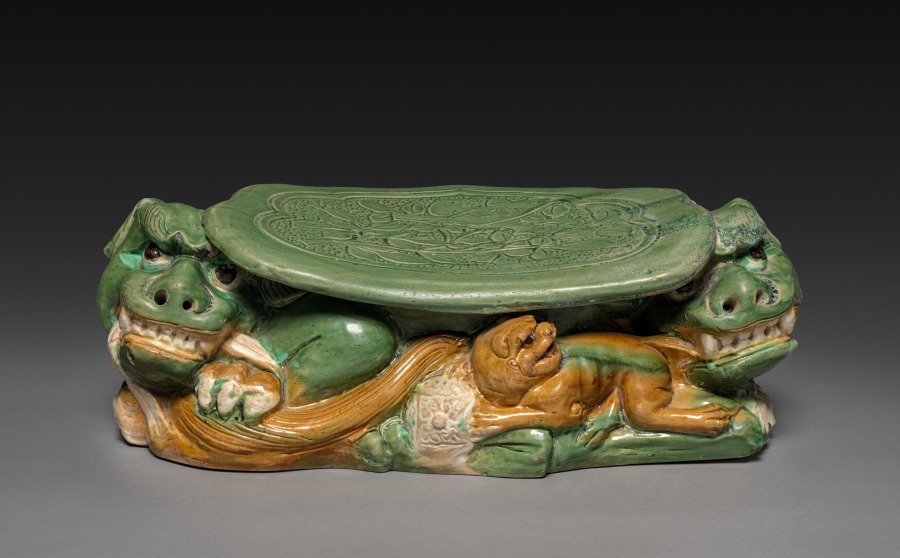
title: Headrest with Three Lions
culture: China, Liao dynasty (916-1125)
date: 916–1125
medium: Glazed earthenware, sancai (three-color ware)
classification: Ceramic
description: Three lions—two ferocious adults and one playful cub—form the base of this Chinese headrest. Often found at burial sites, headrests probably had multiple uses for their owners, but their exact origins are unknown. As ceramic pillows, headrests were cooling on hot summer nights. As decorative objects, their form and ornamentation conveyed symbolic meaning for their owners. Lions are used as decoration on headrests because of their association with protection, as fierce beasts with the strength to ward off evil spirits while one sleeps. While headrests made of hard materials may seem unusual now, their use crosses time periods and cultures.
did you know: Headrests are not just decorative—they would also be slept on as pillows.